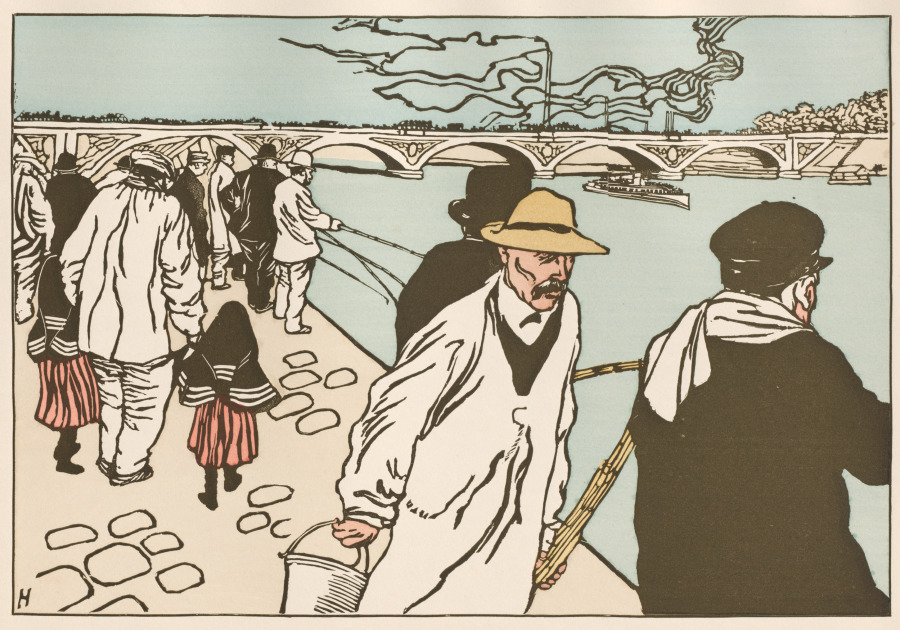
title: Pêcheurs à la Ligne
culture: France, Paris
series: L'Estampe Moderne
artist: Charles Huard (French, 1874–1965)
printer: Imprimerie Champenois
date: 1899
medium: Color lithograph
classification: Bound Volume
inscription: In plate: lower left corner of image: H; upper right corner of sheet: blindstamp of l'Estampe Moderne (Lugt 2790)